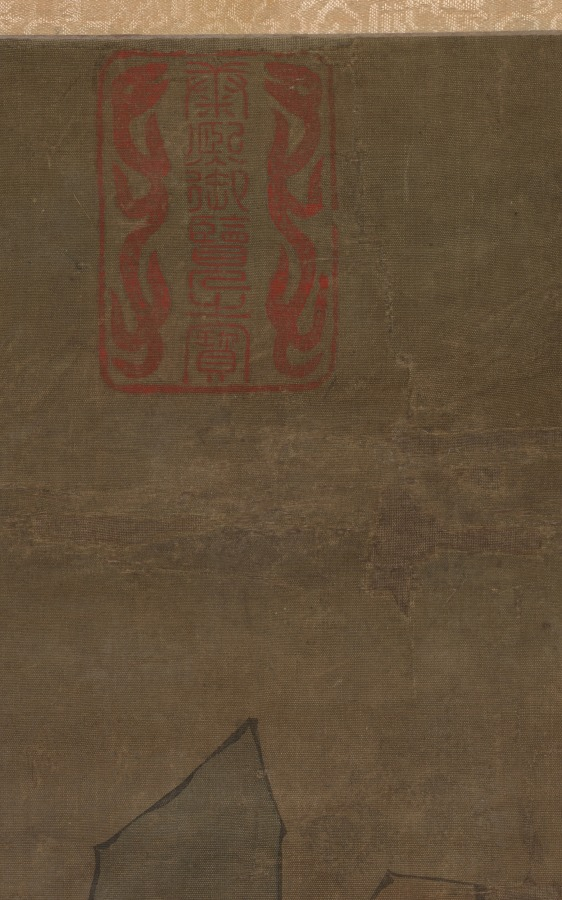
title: Court Ladies in the Imperial Palace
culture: China, Yuan dynasty (1271-1368)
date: 1271–1368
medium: hanging scroll, color on silk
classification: Painting